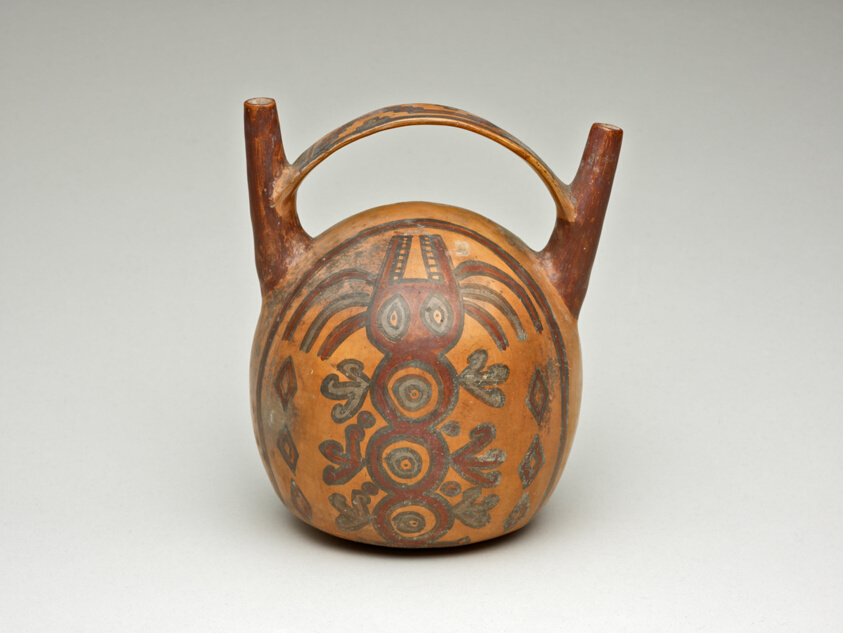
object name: Vessel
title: Double Spout Vessel Depicting an Abstract Animal or Being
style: nazca, Arts of the Americas, andes, south american, andean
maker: Nazca; South coast, Peru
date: 180 BCE–500 CE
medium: Ceramic and pigment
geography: Peru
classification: earthenware; art of the americas; ceramics; vessel